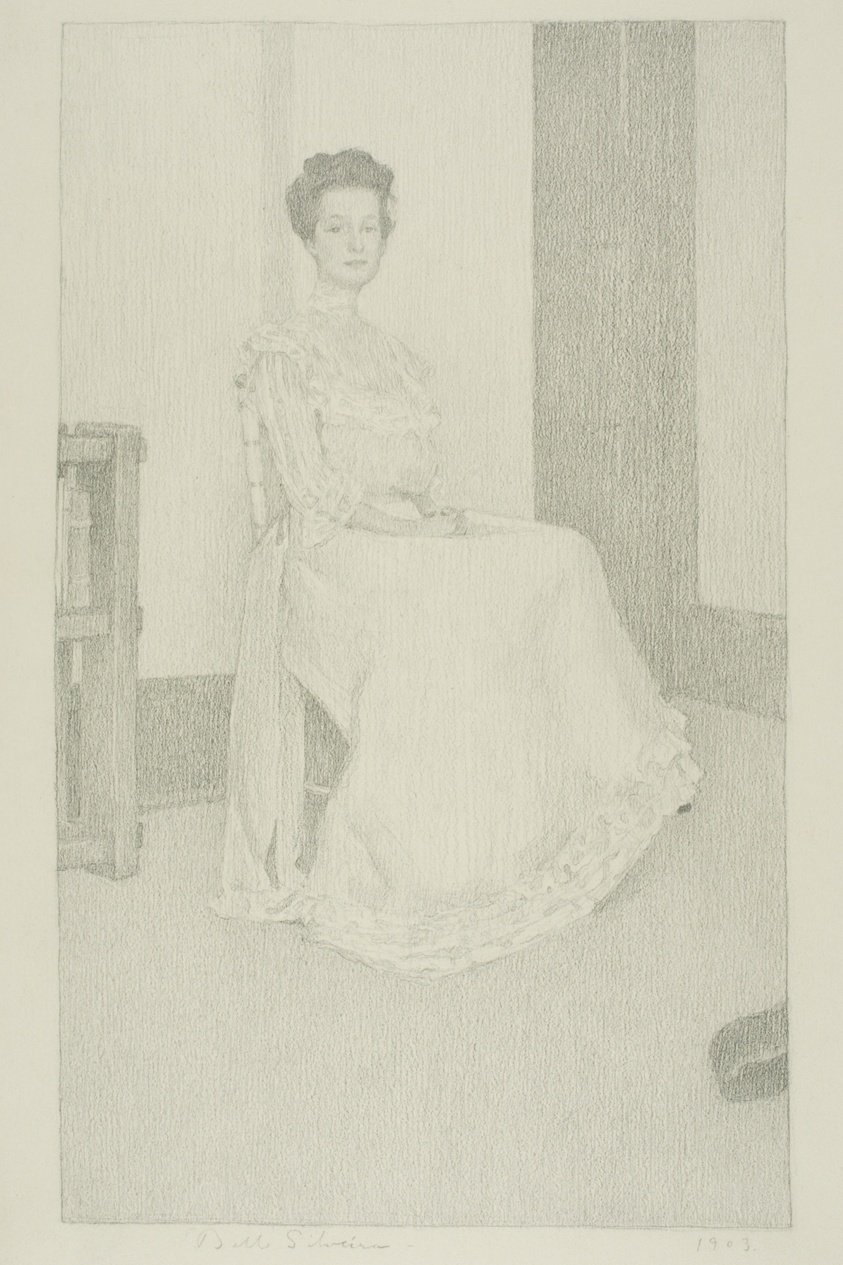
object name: Drawing and Watercolor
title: Ethel Randolph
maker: Belle Silveira Gorski (American, born 1877)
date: 1903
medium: Graphite on ivory wove paper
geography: United States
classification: graphite; drawings (visual works); prints and drawing